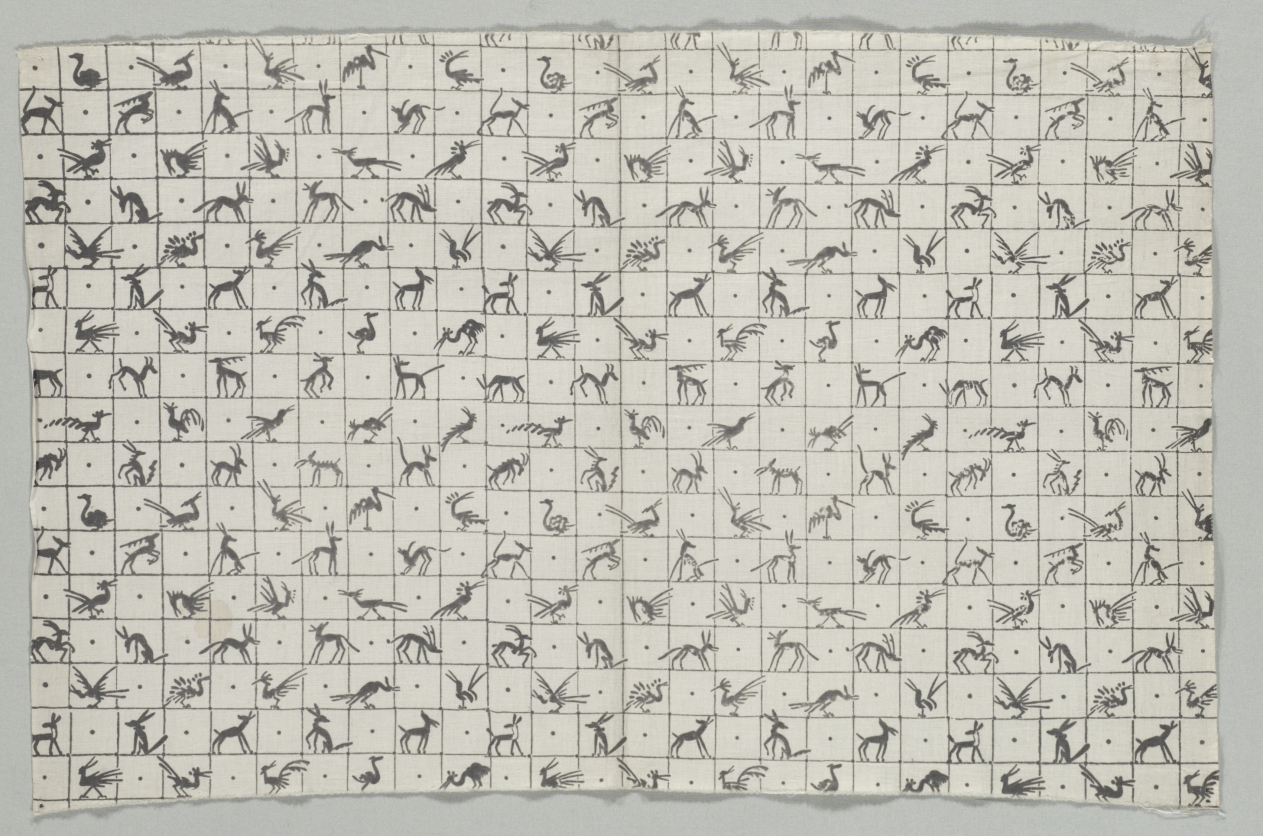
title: Animals in Squares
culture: Germany, Munich, 20th century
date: 20th century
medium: plain weave cotton, printed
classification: Textile